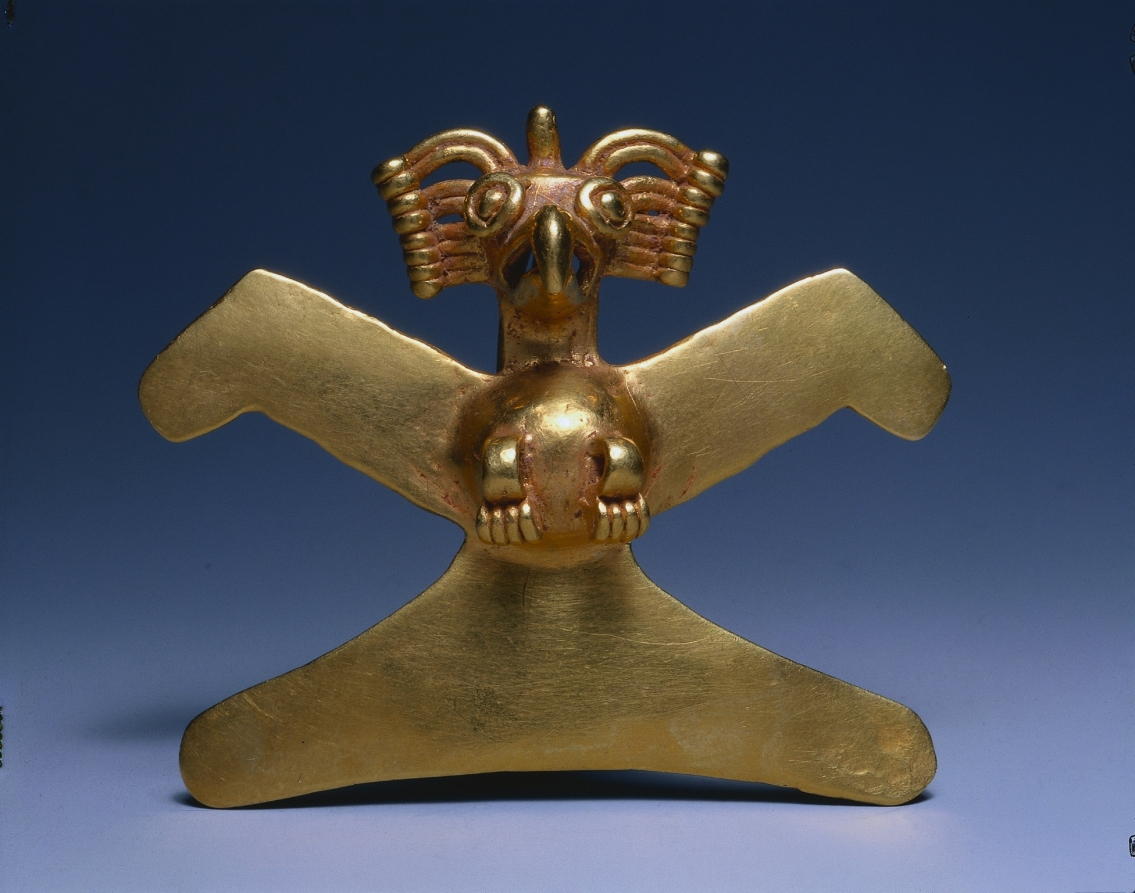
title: Bird Pendant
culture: Panama, Veraguas-Chiriquí style, 10th-16th century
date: c. 1000–1550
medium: cast gold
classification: Metalwork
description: The kinds of birds represented in pendants of the isthmus are not clear, though the emphasis on spread wings and flight suggests birds that soar, such as eagles or hawks. In addition to their aerial agility, they are powerful birds of prey and, therefore, may have symbolized a warrior's or hunter's ferocity and skill. They were also often linked to the sun. Better understanding is difficult because the makers created no written records.